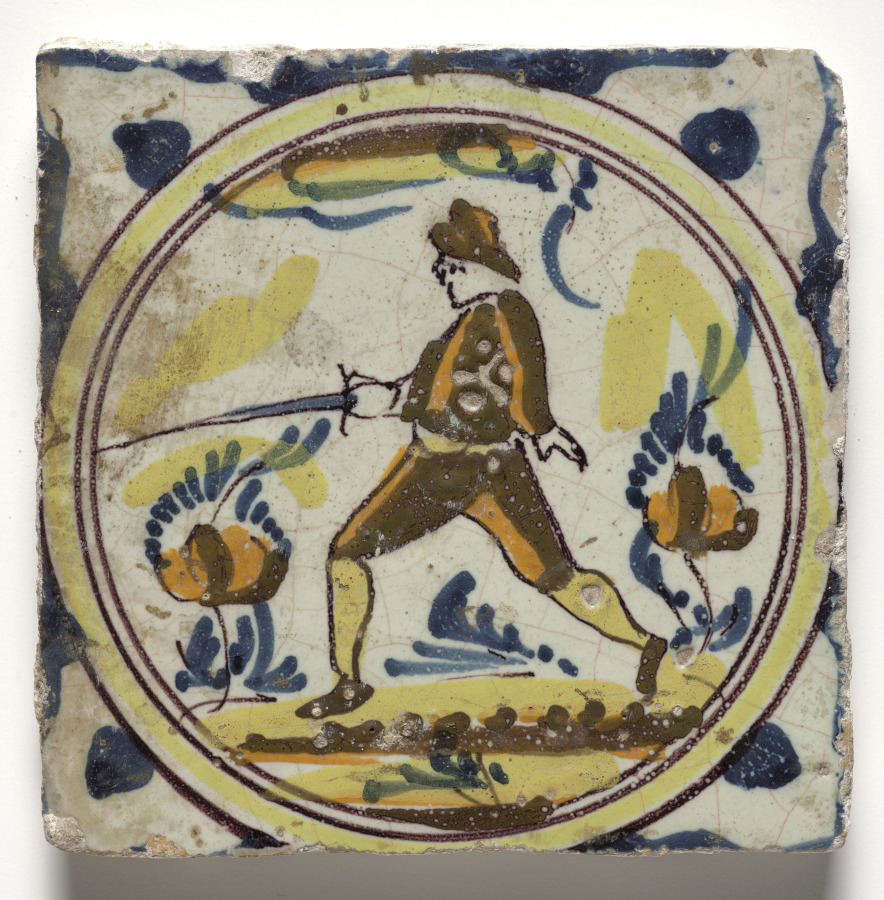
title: Wall Tile–Man with a Sword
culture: Spain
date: c. 1600s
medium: glazed ceramic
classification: Ceramic